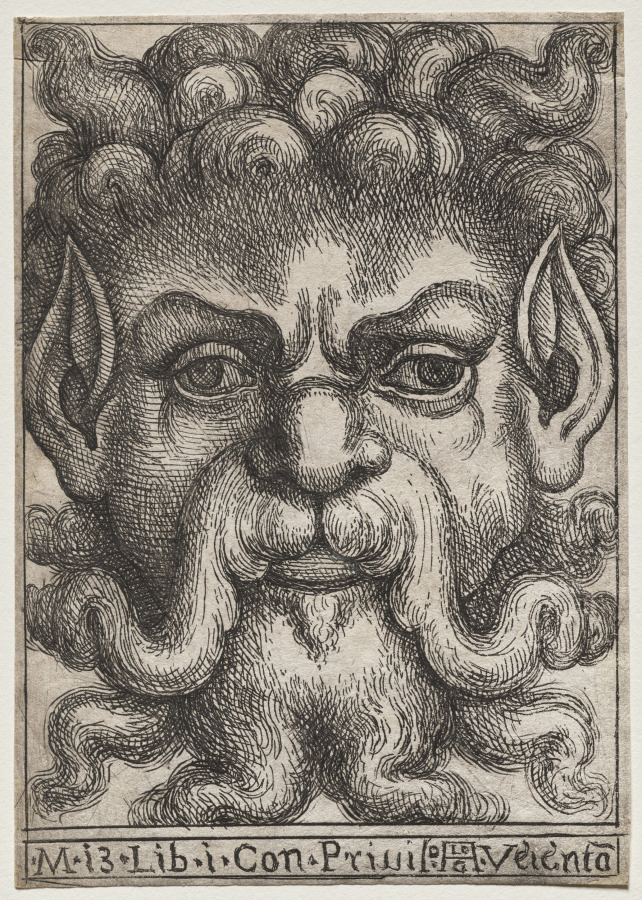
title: Grotesque Masks: Mask 13, Book I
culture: Italy, 17th century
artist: Aloisio Giovannoli (Italian, 1550–1618)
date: c. 1610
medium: etching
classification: Print